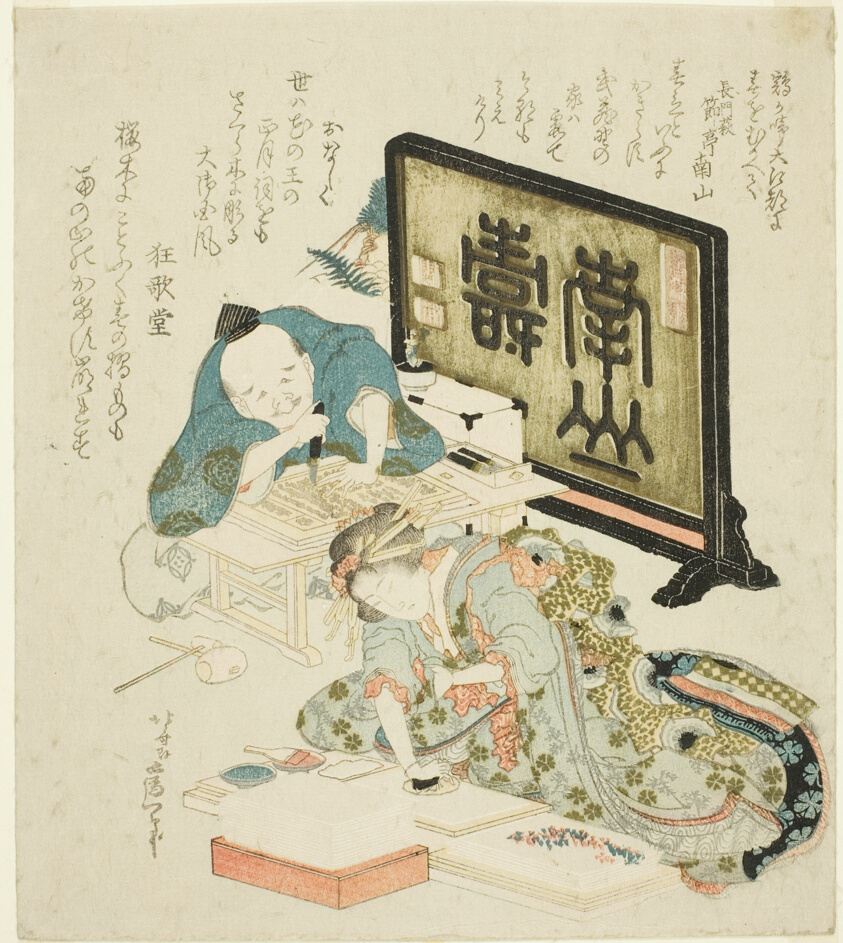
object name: Print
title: Creating surimono for the New Year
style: Japanese (culture or style)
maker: Katsushika Hokusai 葛飾 北斎; Japanese, 1760-1849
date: 1825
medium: Color woodblock print; shikishiban, surimono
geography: Japan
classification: woodblock print; print; asian art